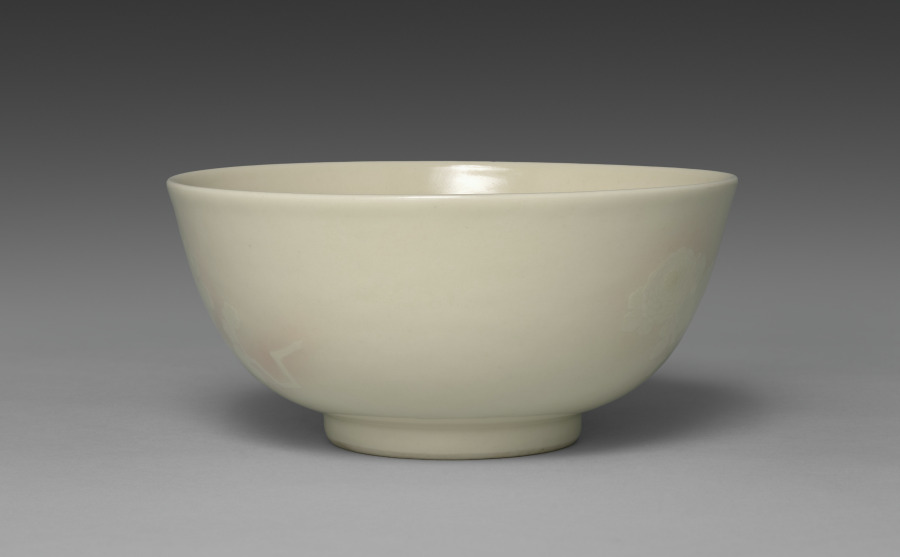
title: Sweets Bowl with Chrysanthemums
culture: Japan, Taishō period (1912–26) or Shōwa period (1926–89)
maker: Seifū Yohei IV (Japanese, 1872–1951)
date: 1914–46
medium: Porcelain with in-glaze and underglaze color and molded design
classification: Ceramic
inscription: 清風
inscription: 成山清風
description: Sweets bowls hold the confections enjoyed when drinking tea. This bowl and CMA 2022.207 offer an important lesson in appreciating Yohei IV’s ceramic practice, for while they have the same design and shape and are made with the same materials, the execution of the pieces makes them entirely different upon close inspection, thereby demonstrating the range of possible production results from a single template. Each bowl has the same composition of two different types of chrysanthemum flowers, one with long, slim, knifelike petals and the other with short, rounded, multilayered petals, shown running around its surface in low relief. The centers of the flowers are painted with yellow under the glaze. Yohei III formulated a number of new underglaze colors during his career, and this is likely one of them. The storage box lid provides abbreviated descriptions of the complex processes used in the surface decorations. It identifies the bowl inside as “Sweets dish with picture of chrysanthemum in kanpakuyū.” The box lid has on its exterior the seal reading “Seizan Seifu” 成山清風, which includes Yohei IV’s style name, but no signature. Instead, a signature is found on the interior of the box lid, accompanied by another seal, this time a gourd-shaped seal reading “Seifu.” The ink inscriptions are in a mode closer to formal script. This bowl, with the signature on the inside of the box lid, stands out for a distinctively bubble-filled glaze with a heavier pink effect, as well as more noticeable yellow at the flowers’ centers and deeper carving in the relief decoration. The design has crept much closer to the rim. A closer look at the delineation of the flower petals reveals that the designs differ at times with respect to which petals appear in front or behind others. The centers of the bases of both bowls are incised with “Seifu” in a manner matching many other works by Yohei IV, although there are slight differences. As one might expect from the other differences in the bowls, the characters on the base of the subtle bowl, CMA 2022.207, are gentler, finishing in a tapering out of the strokes. The strokes on this bold bowl end in triangular pinheads.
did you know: Here Yohei IV used his father’s kanpakuji formula, with underglaze pink for the gradated wash of color surrounding the flowers.